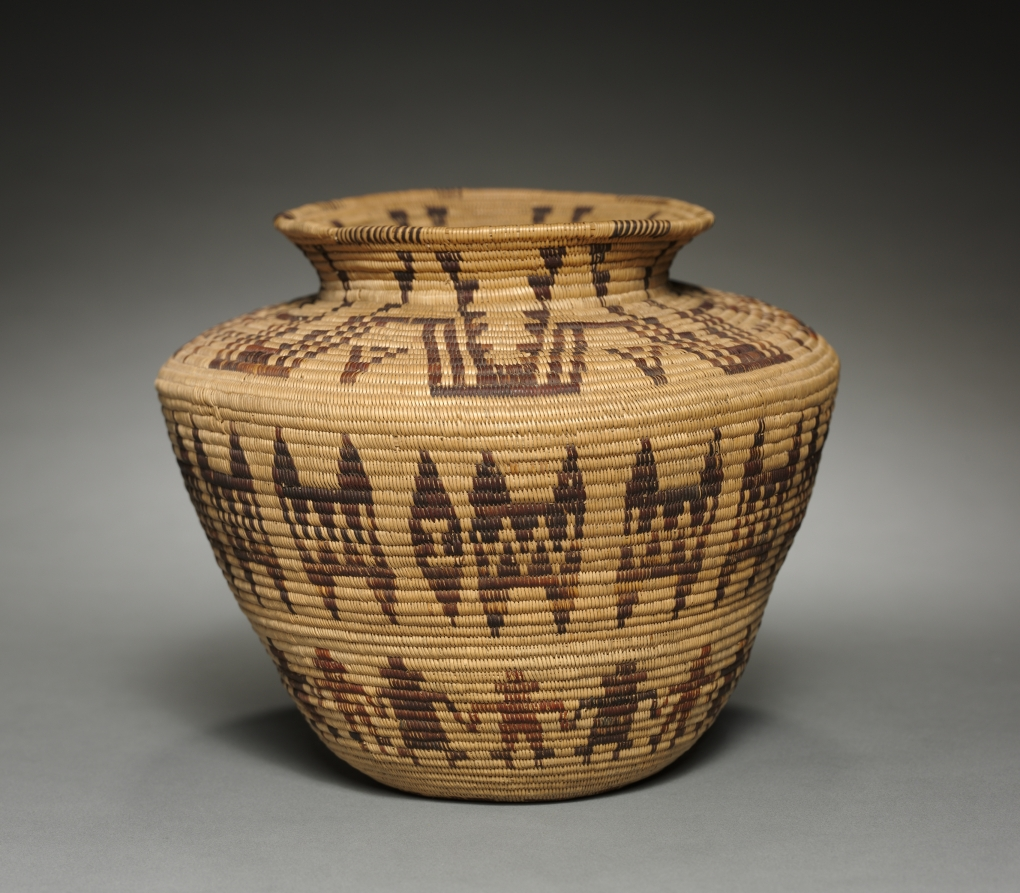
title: Jar-shaped Basket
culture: Native North America, Great Basin, California, Death Valley, Timbisha (Panamint) Shoshone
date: c. 1900–1910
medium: willow, bulrush, yucca root; coiled (3 rods)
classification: Basketry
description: The figures woven in the lower register of this basket were borrowed from basketry of the Yokuts, a California group that lived to the west of Timbisha (Panamint) Shoshone territory.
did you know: The figures woven in the lower register of this basket were borrowed from basketry of the Yokuts.